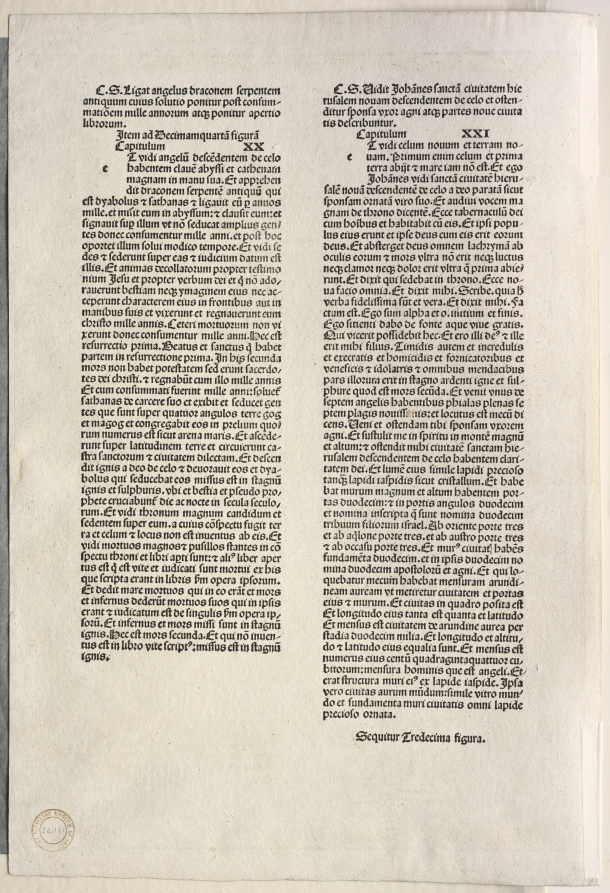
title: Revelation of St. John: The Adoration of the Lamb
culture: Germany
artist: Albrecht Dürer (German, 1471–1528)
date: 1511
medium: woodcut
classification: Print